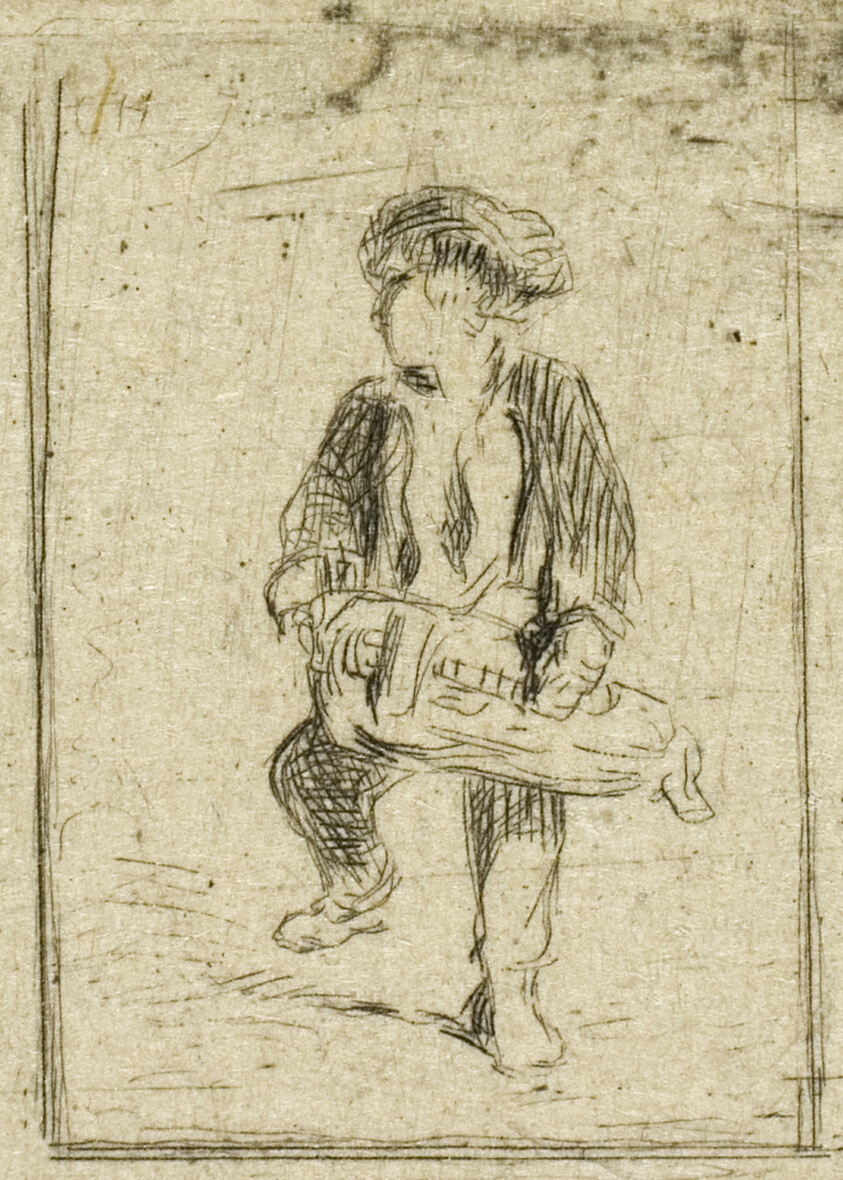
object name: Print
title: Hurdy-Gurdy Player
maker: Charles Émile Jacque (French, 1813-1894)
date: c. 1843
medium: Drypoint and roulette on ivory wove paper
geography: France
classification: drypoint; print; prints and drawing